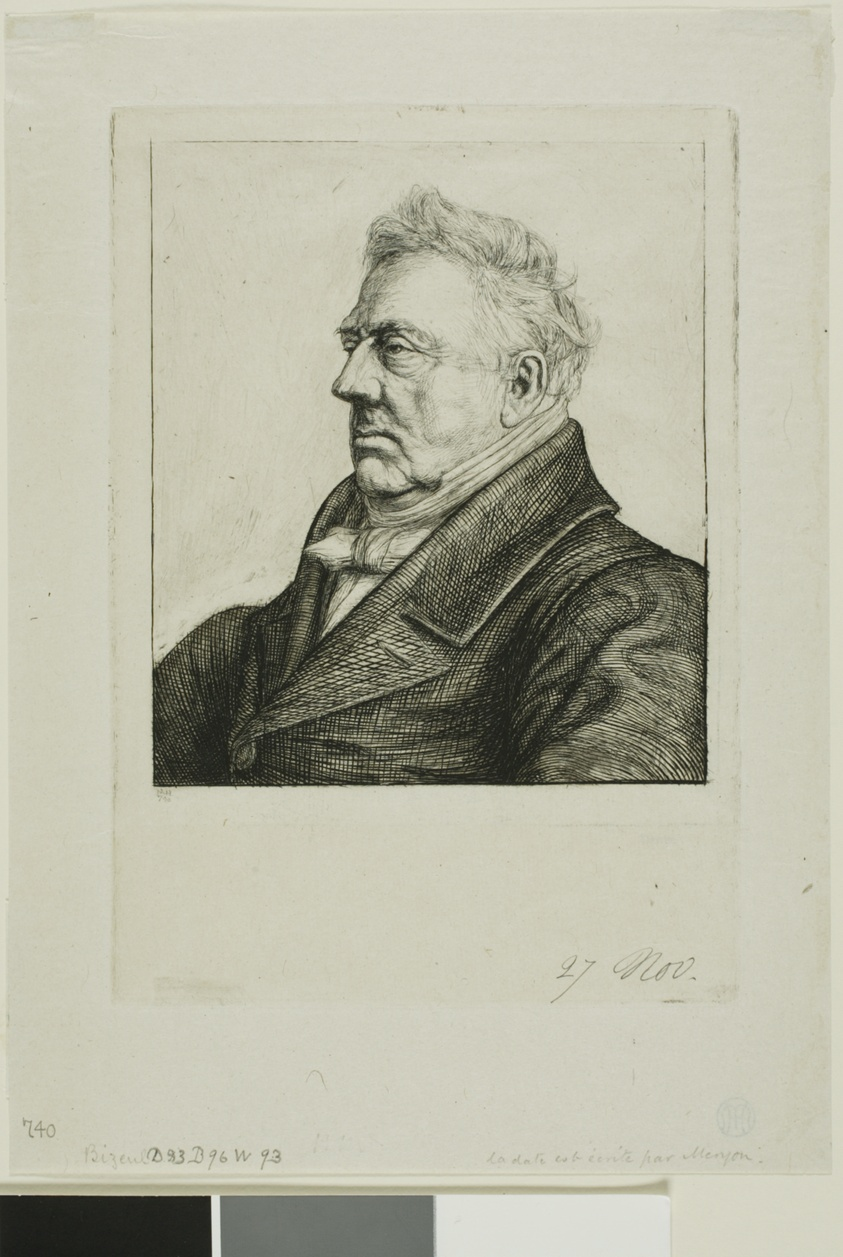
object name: Print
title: Portrait of Louis Jacques Marie Bizeul, the Breton Archaeologist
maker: Charles Meryon (French, 1821-1868)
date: 1861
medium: Etching with engraving and burnishing on grayish ivory laid paper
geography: France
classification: etching; print; prints and drawing